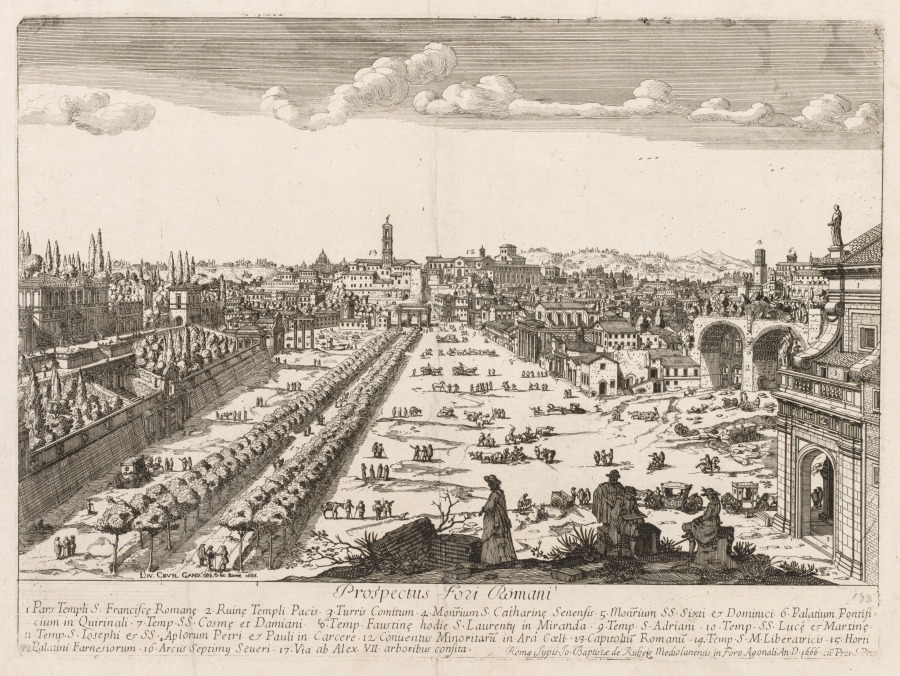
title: Foro Romano from "Prospectus Locurum Urbis Romae Insign[ium]"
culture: Flanders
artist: Lievin Cruyl (Flemish, c. 1640-c. 1720)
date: 1666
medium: etching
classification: Print